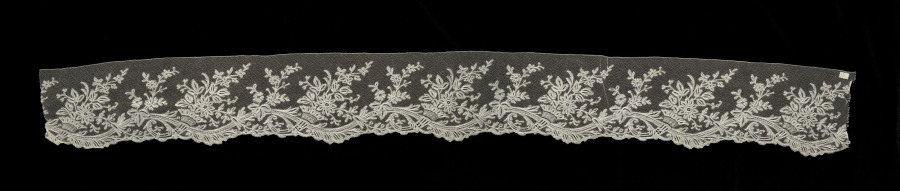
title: Lace Edging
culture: France, Valenciennes or Flanders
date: 1900–1935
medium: Linen: bobbin lace (Valenciennes)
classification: Lace